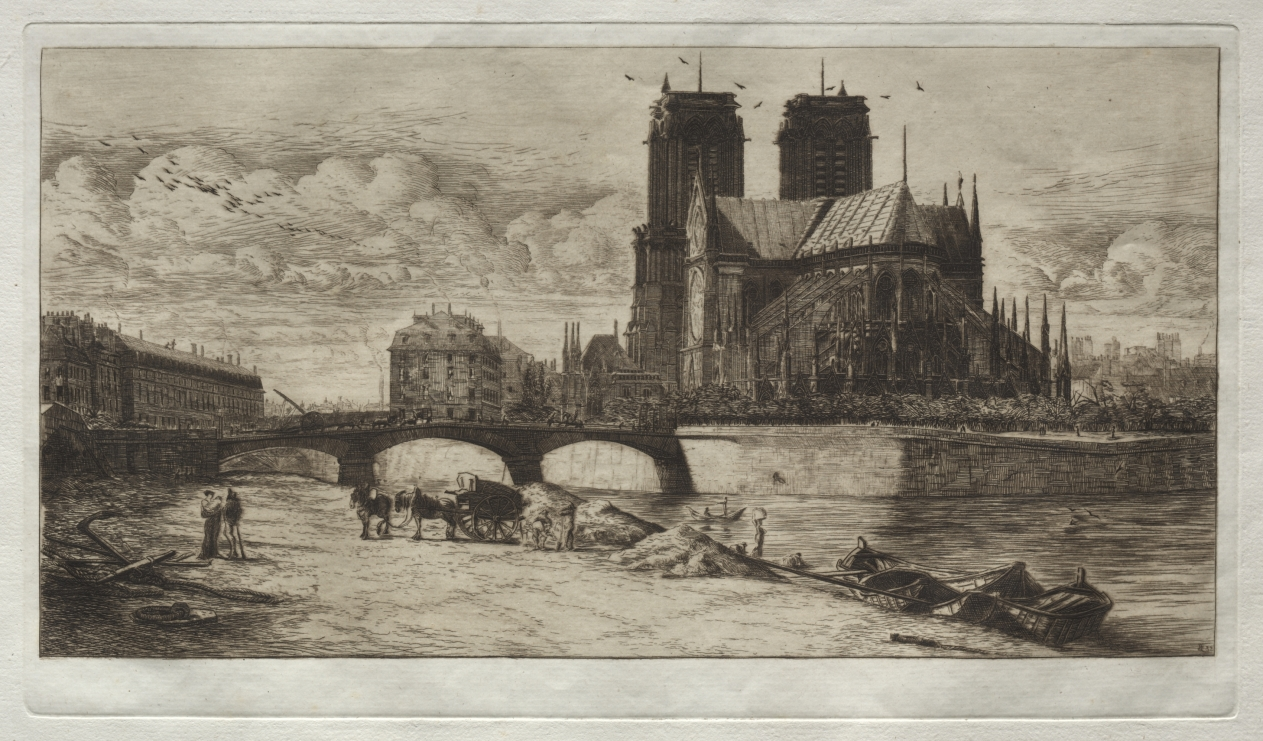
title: L'Abside de Notre Dame de Paris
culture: France, 19th century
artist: Edmond Gosselin (French)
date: c. 1881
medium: etching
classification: Print